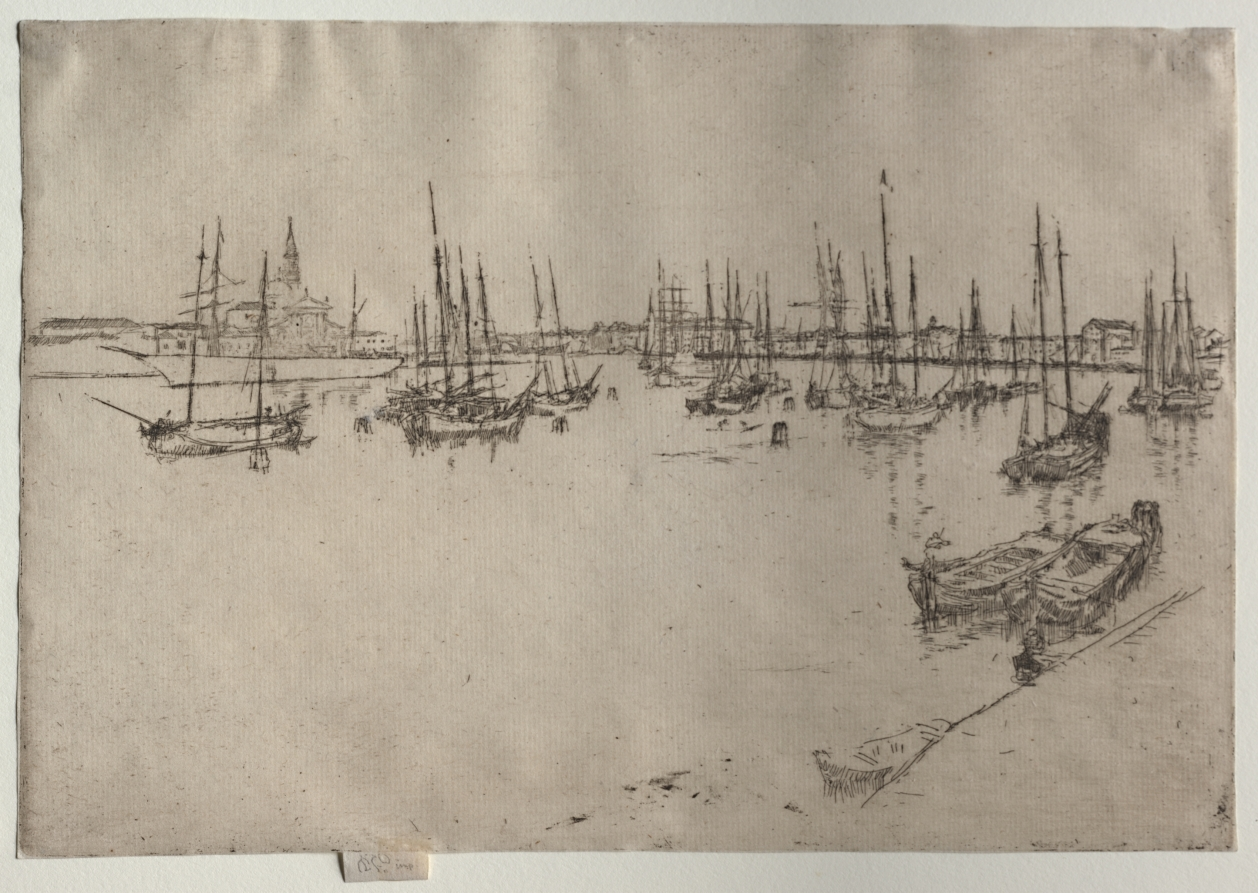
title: San Giorgio, Venice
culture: America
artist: James McNeill Whistler (American, 1834–1903)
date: 1886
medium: etching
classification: Print